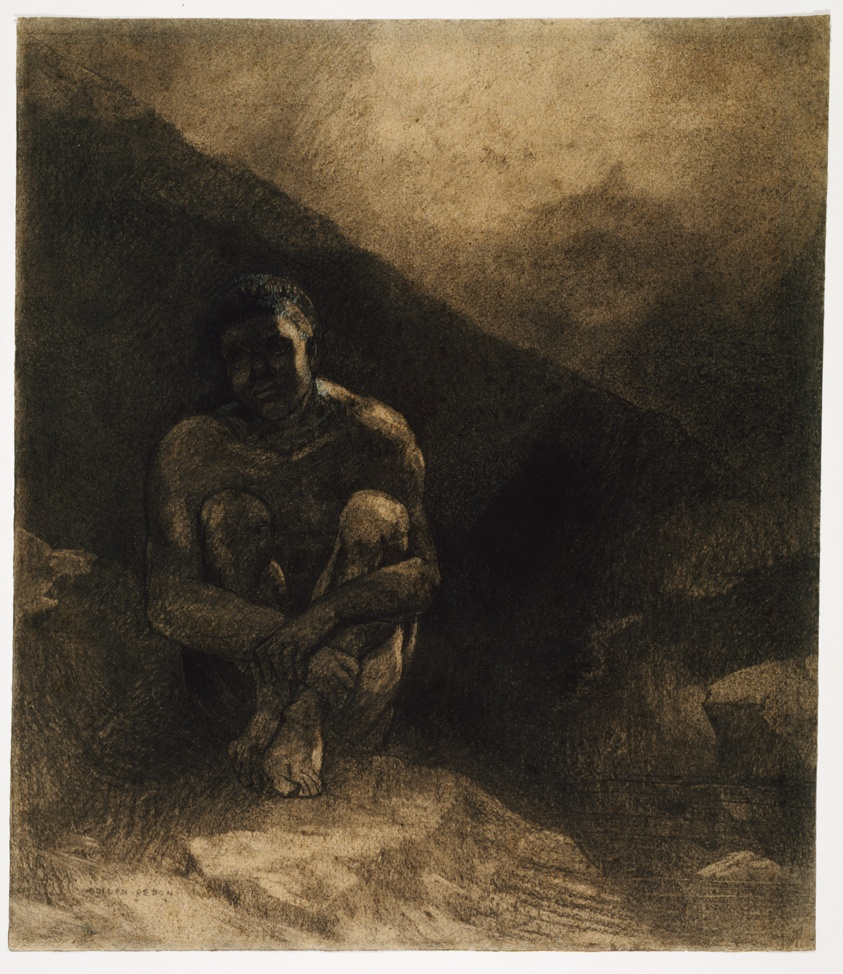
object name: Drawing and Watercolor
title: Primitive Man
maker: Odilon Redon (French, 1840-1916)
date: 1872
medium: Various charcoals, with touches of black chalk, stumping, wiping and erasing, heightened with touches of white and ocher gouache, on cream wove paper altered to a pale, golden tone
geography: France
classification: charcoal; drawings (visual works); prints and drawing; paper